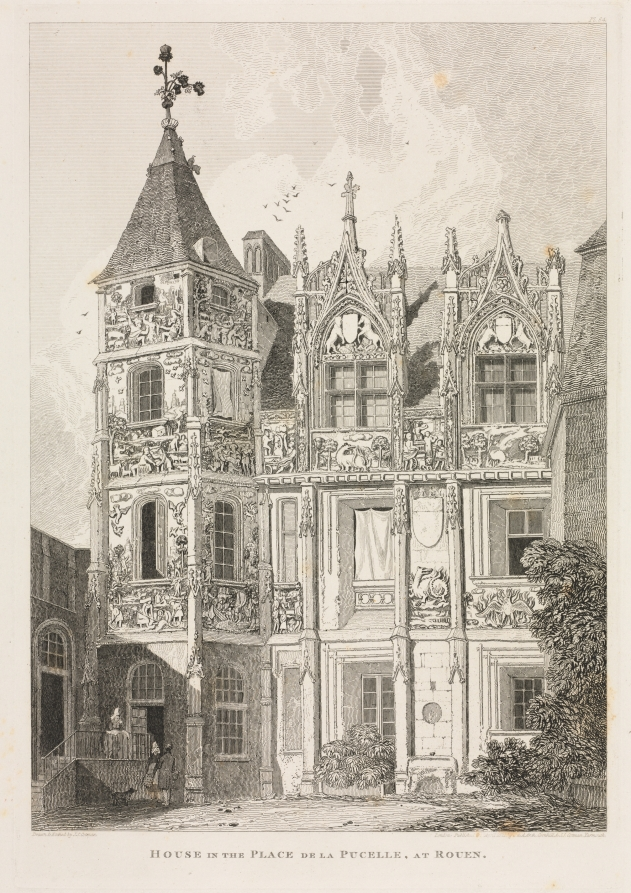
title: Architectural Antiquities of Normandy (Vol. II), Pl. 64: House in the Place de la Pucelle, at Rouen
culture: England, 19th century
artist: John Sell Cotman (British, 1782–1842)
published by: J & A Arch, Cornhill & J.S. Cotman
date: 1821, published 1822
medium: softground etching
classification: Print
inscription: Signed lower right in plate: "J.S.Cotman" titled lower left in plate